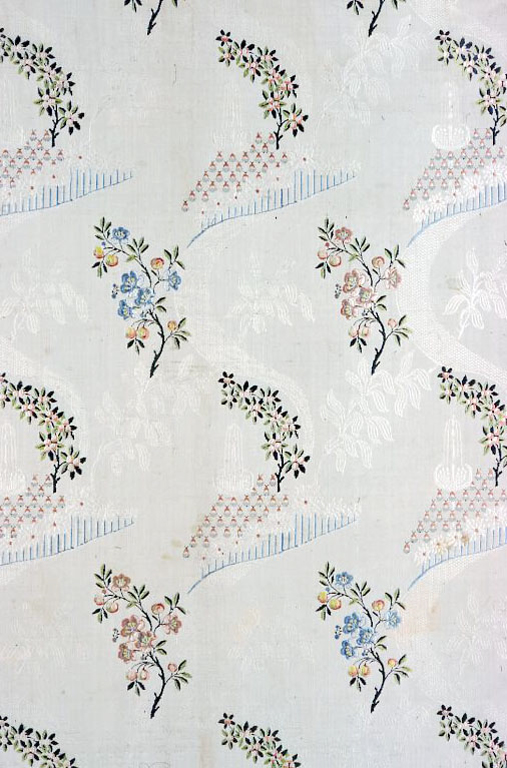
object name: Textile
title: Panel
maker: Probably Germany or Sweden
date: 1765/70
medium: Silk, plain weave with supplementary patterning wefts and supplementary brocading wefts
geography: Germany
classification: textile; weaving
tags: flowers, fountains, garlands